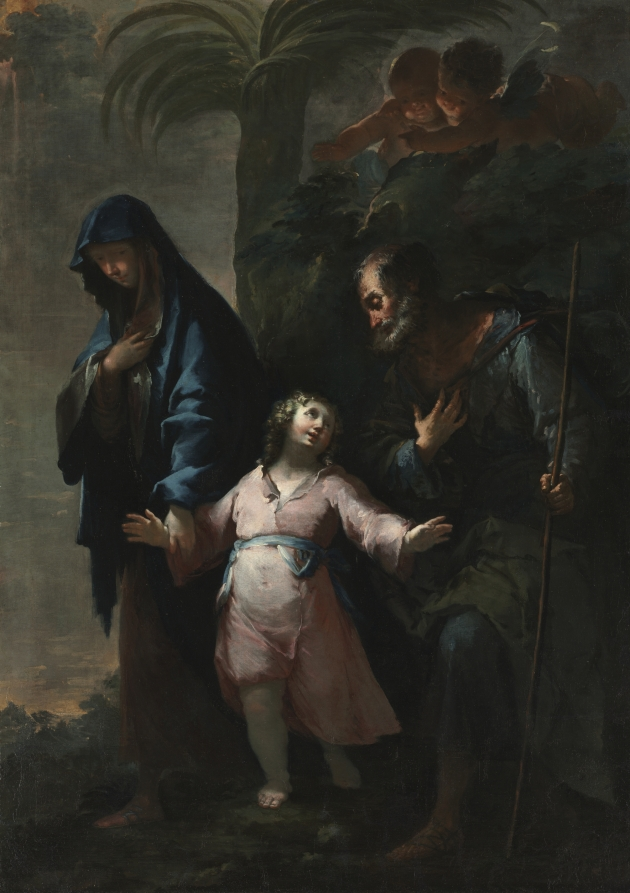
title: Return to Nazareth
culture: Italy, 18th century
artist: Francesco Conti (Italian, 1681–1760)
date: 1735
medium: oil on canvas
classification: Painting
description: Upon hearing rumor of a young king born to a virgin in Bethlehem, Herod, the ruler of Judea, jealously developed a plot to find and murder the infant Jesus. Fearing Herod's wrath, the Holy Family escaped to Egypt and eventually returned to Palestine-an echo of the great Exodus of the Old Testament. Conti trained in Rome but eventually made his career in Florence. Even given the pale colors, balletic poses, and attenuated forms, the sharp contrasts of dark and light, with figures emerging from deep shadow, attests to the long shadow of Caravaggio even in Florence a century later.